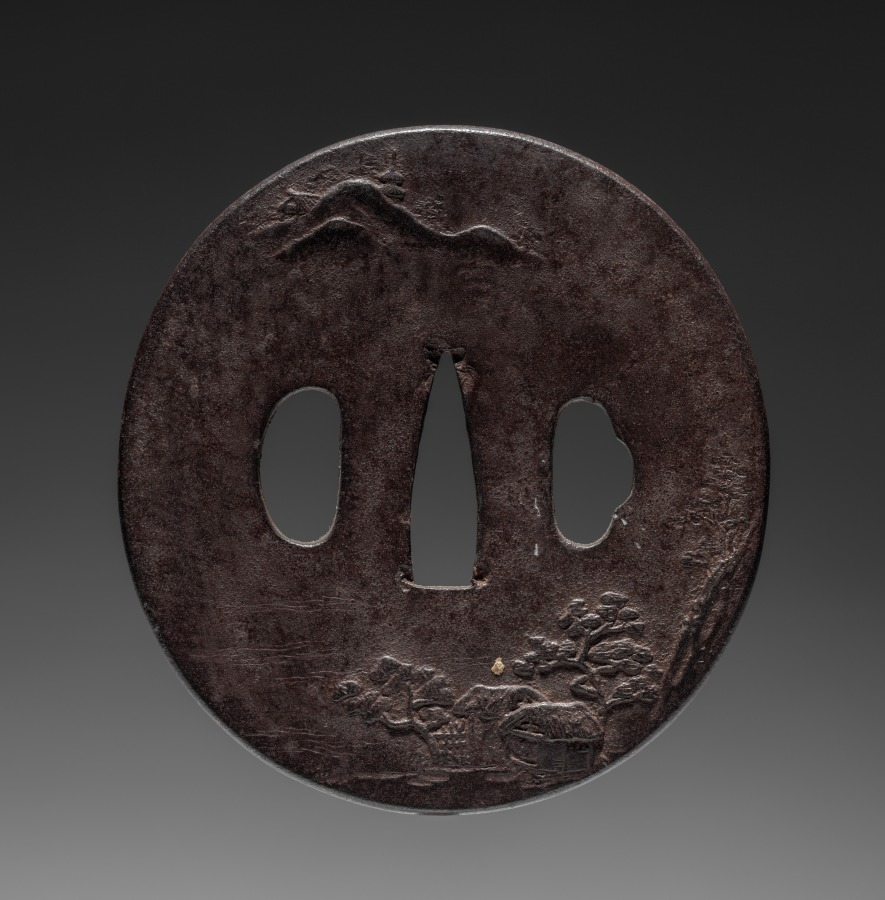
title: Sword Guard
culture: Japan, Edo period (1615–1868)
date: mid-1800s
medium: iron (Omori type)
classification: Arms and Armor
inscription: signed "Hidenobu" with seal.